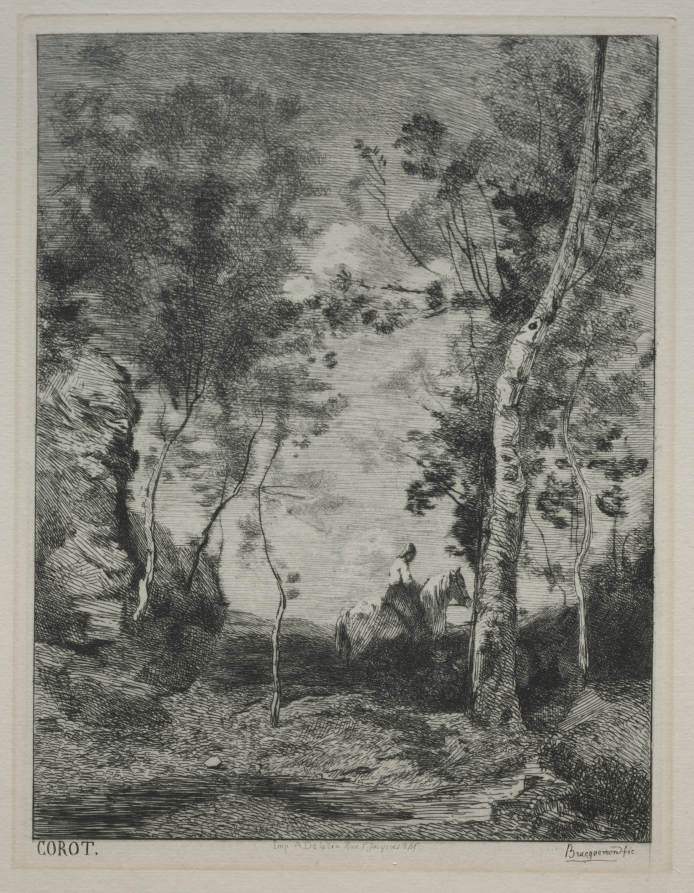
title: Landscape, or The White Horse, after Corot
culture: France, 19th century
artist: Félix Bracquemond (French, 1833–1914)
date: c. 1858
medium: etching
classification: Print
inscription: lower left, in plate: COROT; lower center, in plate: Imp. A. Delâtre Rue St. Jacques 171; lower right, in plate: Bracquemond féc.